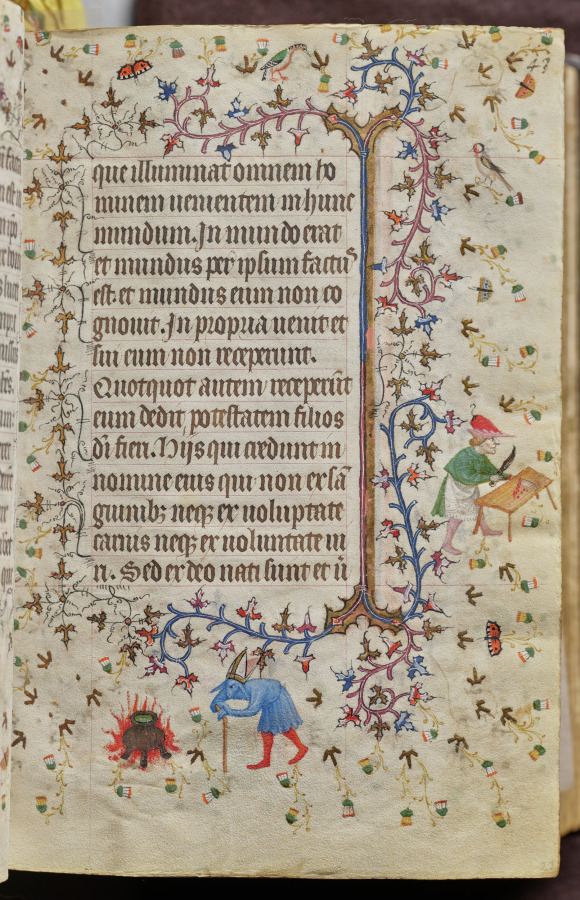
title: Hours of Charles the Noble, King of Navarre (1361-1425): fol. 22r,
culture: France, Paris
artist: Master of the Brussels Initials and Associates (French)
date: c. 1405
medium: ink, tempera, and gold on vellum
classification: Bound Volume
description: This precious volume was obviously highly prized by its owner, the French-born King of Navarre, who had his coat of arms painted on no less than twenty folios. Rather than directly commissioning this manuscript from a specific workshop, it seems that Charles the Noble acquired his book of hours -- perhaps ready-made for the luxury market -- while on a trip to Paris in 1404-05. A collaborative effort, six painting styles are evidenced within the pages of this codex, those of two Italians, two Frenchmen, and two Netherlanders. The painter who was responsible for the planning and decoration of the book, and who produced seventeen of the large miniatures, was a Bolognese artist known as the Master of the Brussels Initials. His principal assistant, responsible for most of the borders, was a Florentine who signed his name "Zecho" da Firenze on folio 208 verso.